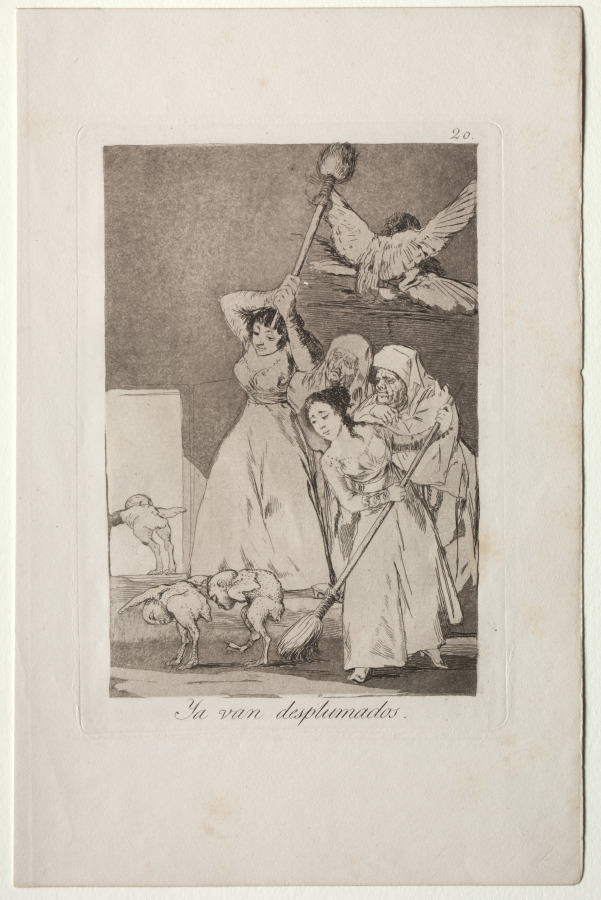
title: There They Go Plucked, Plate 20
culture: Spain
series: Los Caprichos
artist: Francisco de Goya (Spanish, 1746–1828)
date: 1799 (printed c. 1855)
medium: etching and aquatint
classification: Print